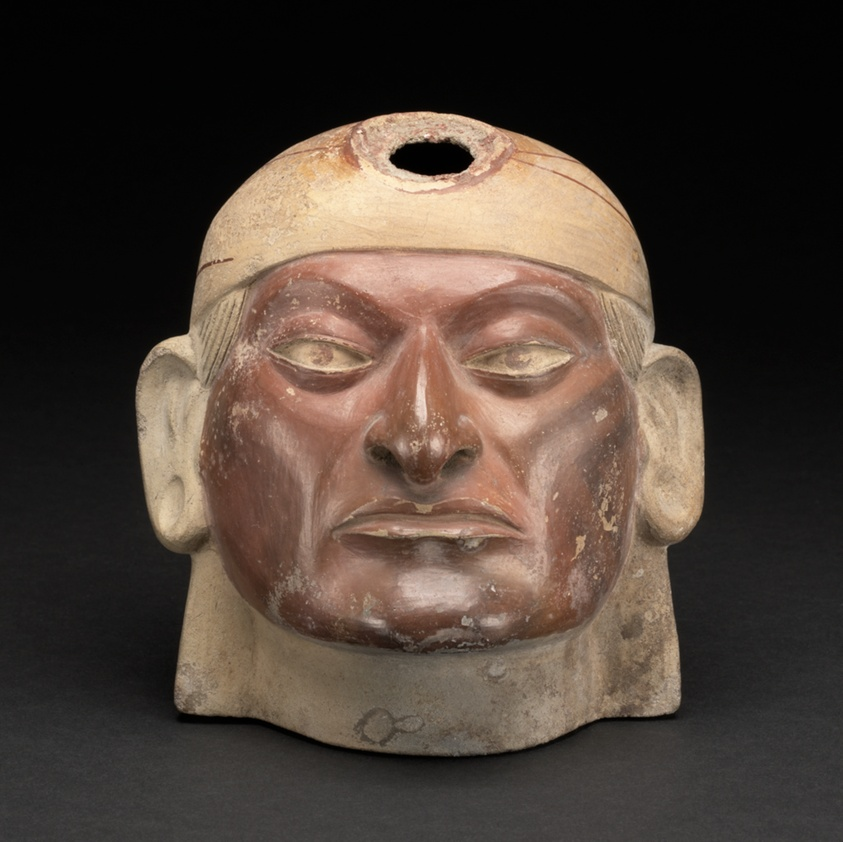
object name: Vessel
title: Portrait Vessel of a Ruler, Stirrup Missing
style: moche, mochica, early intermediate period, Pre-Columbian, americas, Arts of the Americas, andean, andes, south american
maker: Moche (North coast, Peru)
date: 100 BCE–500 CE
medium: Ceramic and pigment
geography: Peru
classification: earthenware; art of the americas; ceramics; vessel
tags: people, portraits